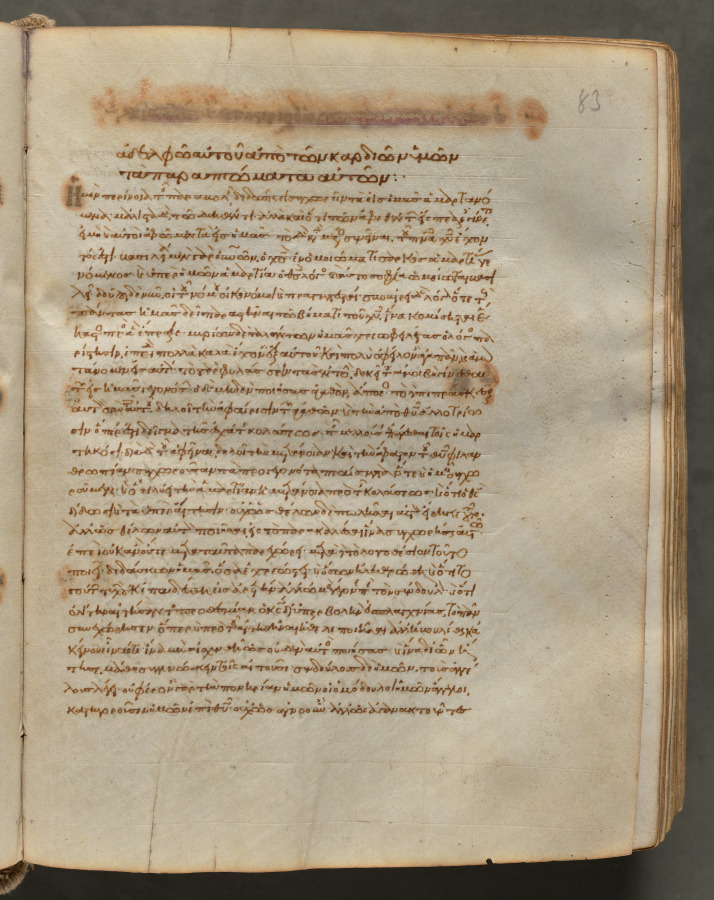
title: Text, folio 83 (recto), from a Gospel Book with Commentaries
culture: Byzantium, Constantinople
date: c. 1000–1100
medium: ink, tempera, and gold on vellum; leather binding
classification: Bound Volume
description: Each of the four gospels in this book opens on a page with brilliantly illuminated borders depicting the author of the text as well as birds-principally peacocks, symbols of the immortality of the soul-and fountains, representing the fountain of life and the salvation of the soul. This volume consists of 428 leaves with texts in Greek. Its level of sophistication suggests that it was probably written and decorated in a monastery in Constantinople.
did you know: Gospel Books were carried in procession through Byzantine churches.